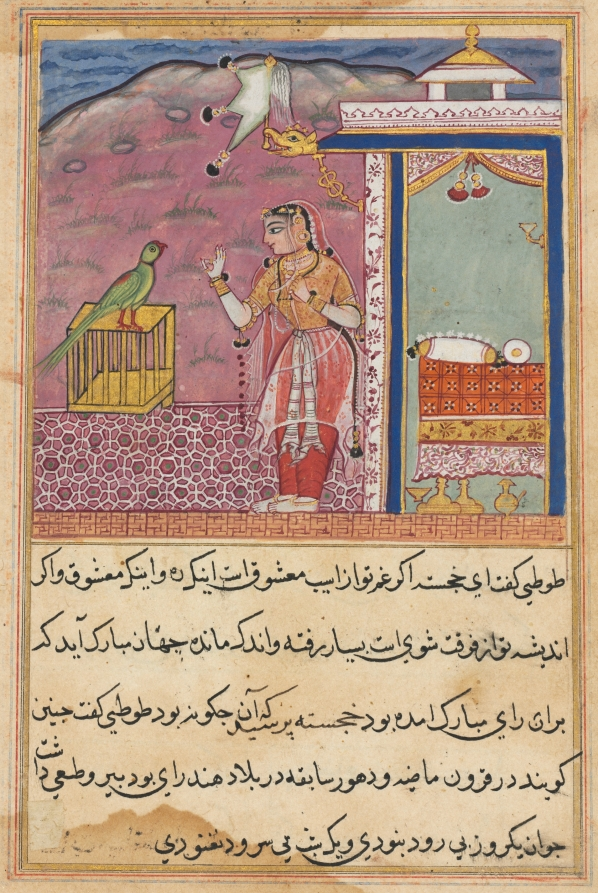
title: The parrot addresses Khujasta at the beginning of the forty-fourth night, from a Tuti-nama (Tales of a Parrot)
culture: Mughal India, court of Akbar (reigned 1556–1605)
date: c. 1560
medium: gum tempera, ink, and gold on paper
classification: Painting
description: Standing against a brightly colored landscape, Khujasta consults with Tuti, the clever, talking parrot. He tells her the story of a raja whose children planned to kill him and the musician whose words brought them to their senses. This image is composed of the pale tones that were popular in a pre-Mughal Indo-Persian painting style.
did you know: The flag at the end of the eave is held in the snout of a Ganges crocodile head.